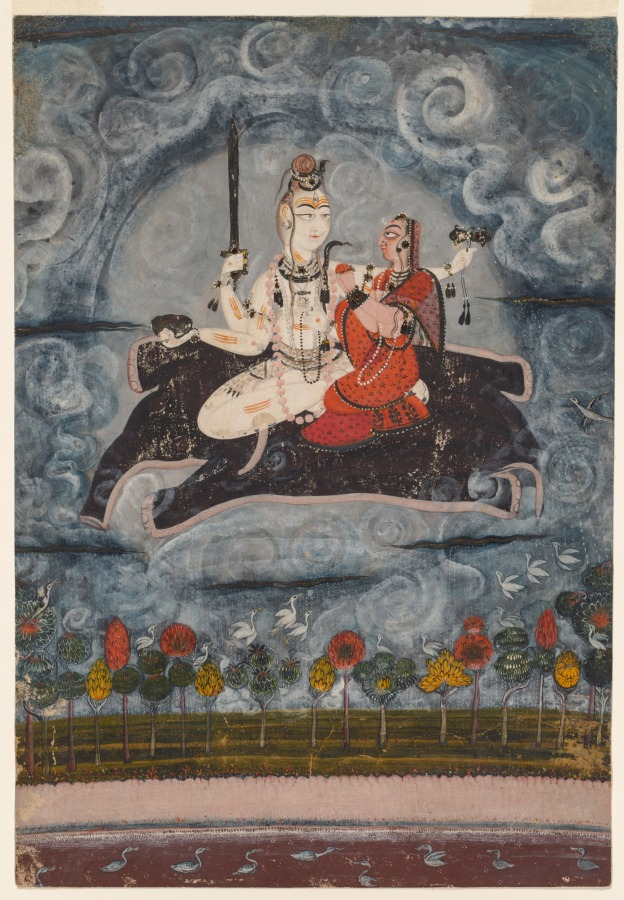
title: Shiva and Devi on Gajasura's hide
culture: Northern India, Pahari kingdoms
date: c. 1675–80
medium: Gum tempera and silver on paper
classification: Painting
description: These divine lovers embody the duality of opposites: male/female, yogi/princess, death/ birth, and destruction/creation. Their gazes are locked on each other, linking them in loving unity as they float on the skin of an elephant demon through swirling monsoon clouds above the earth. The god Shiva looks like a yogi with matted locks of hair entwined with serpents, white skin smeared with ash from funeral pyres, the third eye of true knowledge, triple-line sectarian marks, a garland of severed heads, and the leopard-skin loincloth. In three hands he holds emblems of destruction: skull cup, sword, and a drum that beats the rhythm of time. His fourth hand rests tenderly on the shoulder of his wife, the goddess Devi, also known as Parvati, who perches on his lap, her hands in a gesture of honor.